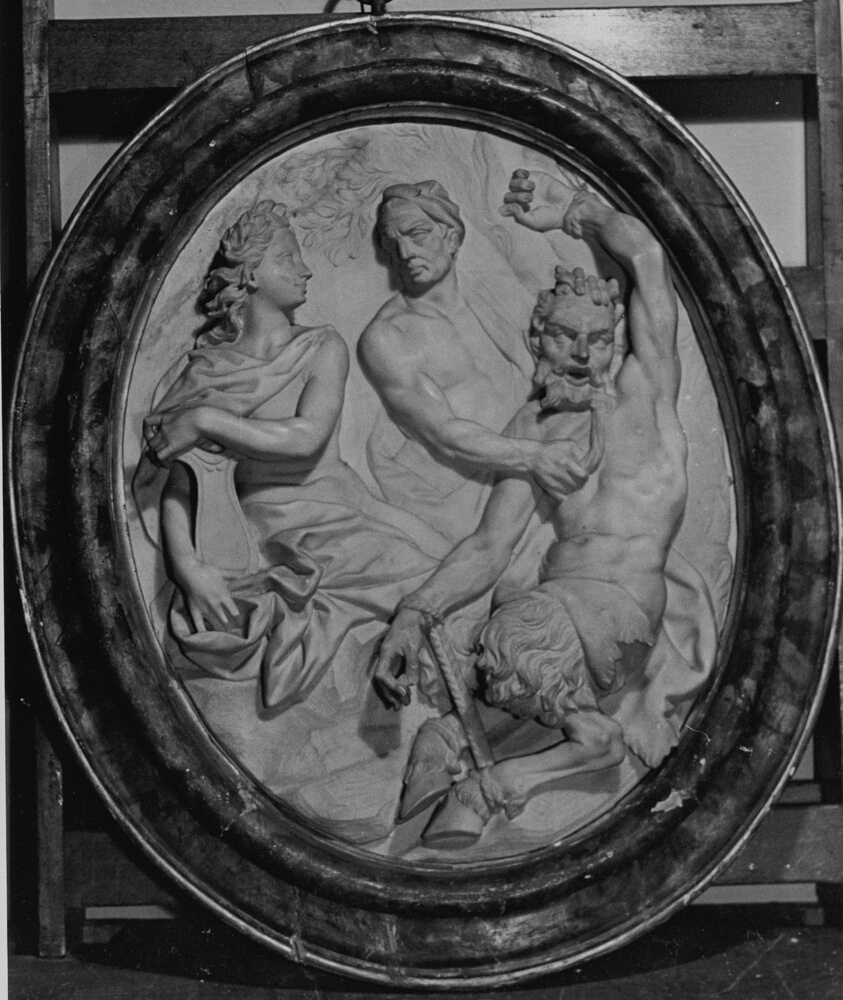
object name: Sculpture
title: Apollo and Marsyas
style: 18th Century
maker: Domenico Antonio Vaccaro (Italian, 1678–1745)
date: c. 1720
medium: Marble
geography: Italy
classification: relief; sculpture; Italian; marble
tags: gods (deities), trees, men, satyr, musical instruments, violence, music, Competition, woman, man